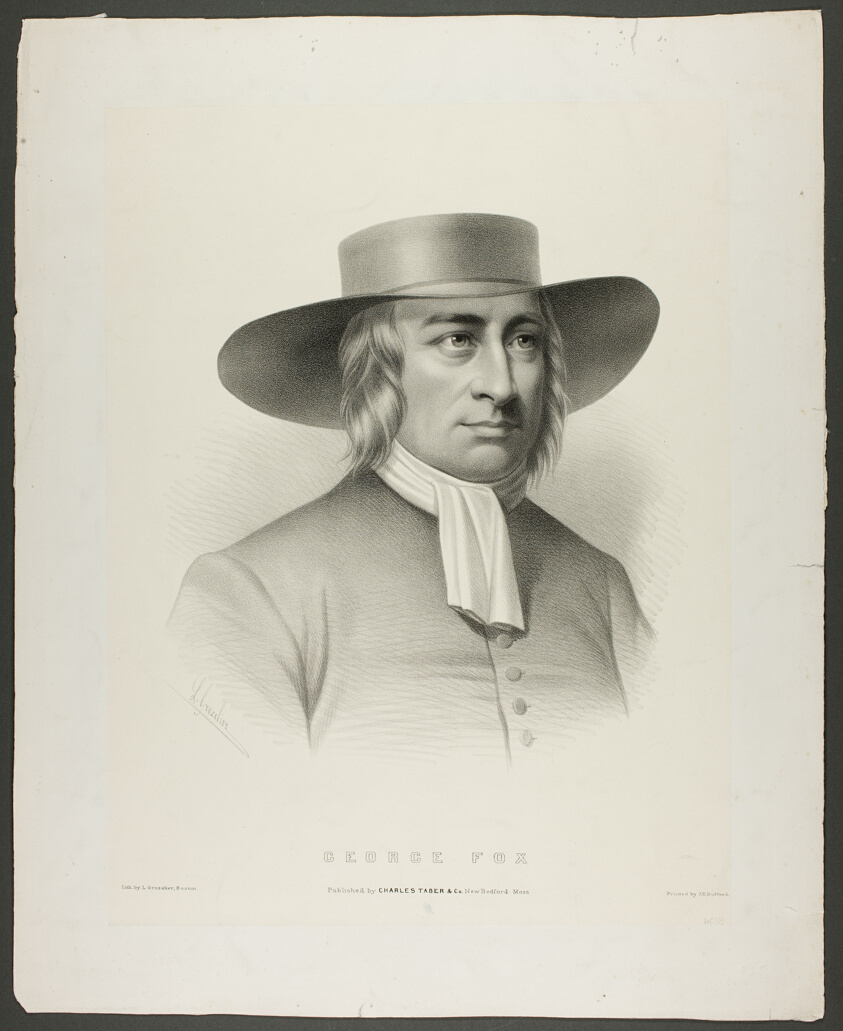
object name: Print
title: George Fox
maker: Leopold Grozelier (American, 1830-1865)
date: c. 1858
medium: Lithograph on cream chine, laid down on ivory wove paper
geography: United States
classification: lithograph; print; prints and drawing